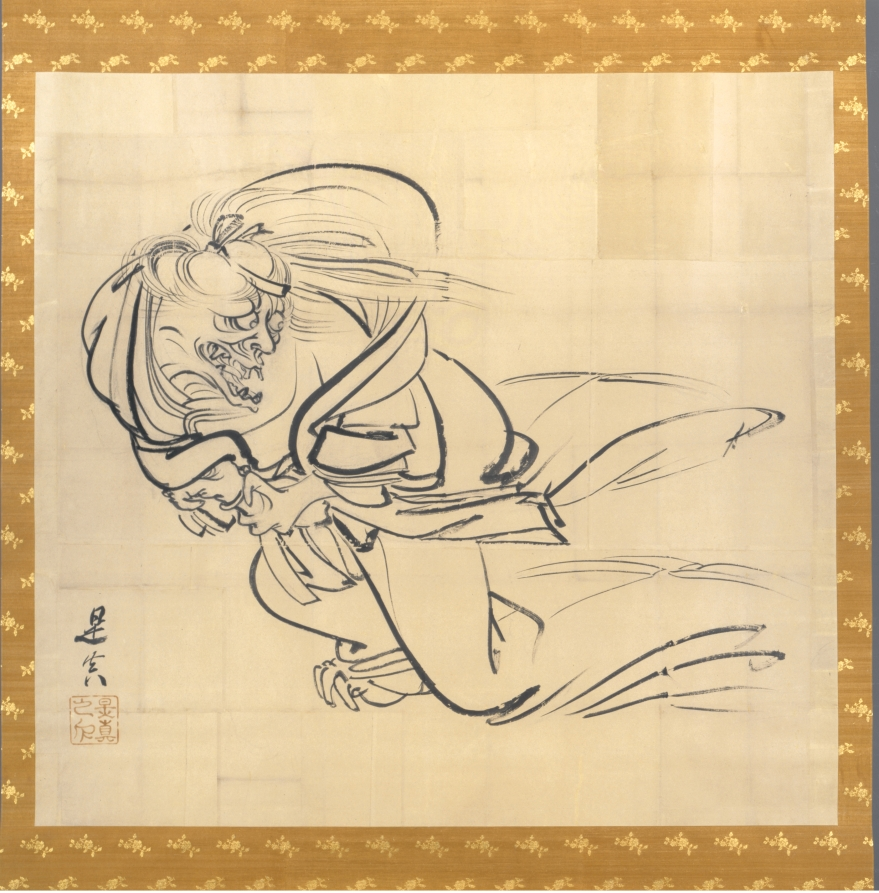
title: Sketch of Ibaraki-dōji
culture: Japan, Edo period (1615–1868)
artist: Shibata Zeshin (Japanese, 1807–1891)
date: c. 1840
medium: hanging scroll, ink on paper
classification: Painting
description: Even before the arrival of US ships demanding trade, Japan’s military government was experiencing economic challenges. This preparatory drawing is for a wooden plaque to be offered to a shrine, beseeching divine intervention in business affairs. Commissioned by a wholesalers’ union, it shows the demon Ibaraki-dōji reclaiming his arm from a warrior who, according to legend, had cut it off. The repossession of the arm is a metaphor for the union’s desire for the restoration of rights to sell sugar, which had been rescinded by the government as part of a misguided effort to stabilize the economy.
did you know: The demon Ibaraki, having disguised itself as the aunt of warrior Minamoto no Yorimitsu to gain access to its severed limb, is shown is in the midst of transforming back into demon form.